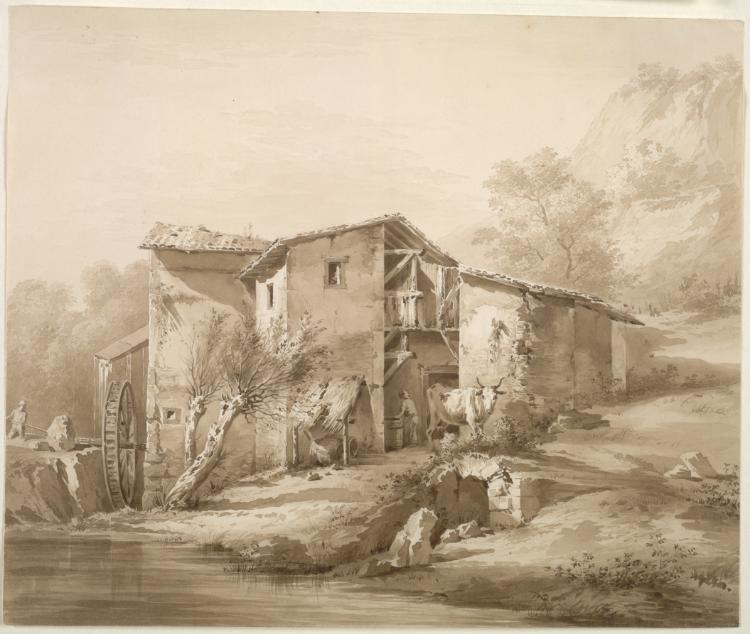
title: Landscape with Watermill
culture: France, 18th century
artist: Jean Jacques de Boissieu (French, 1736–1810)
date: c, 1790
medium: Brown ink wash and point of brush with graphite underdrawing on cream wove paper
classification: Drawing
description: Boissieu’s pastoral landscapes are characterized by meticulous detail and sensitive variations in light and shadow skillfully created with brush and wash. Largely self-taught, Boissieu drew inspiration from the watermills, windmills, and rustic figures in Dutch art and the countryside around Lyon where he lived all his life.